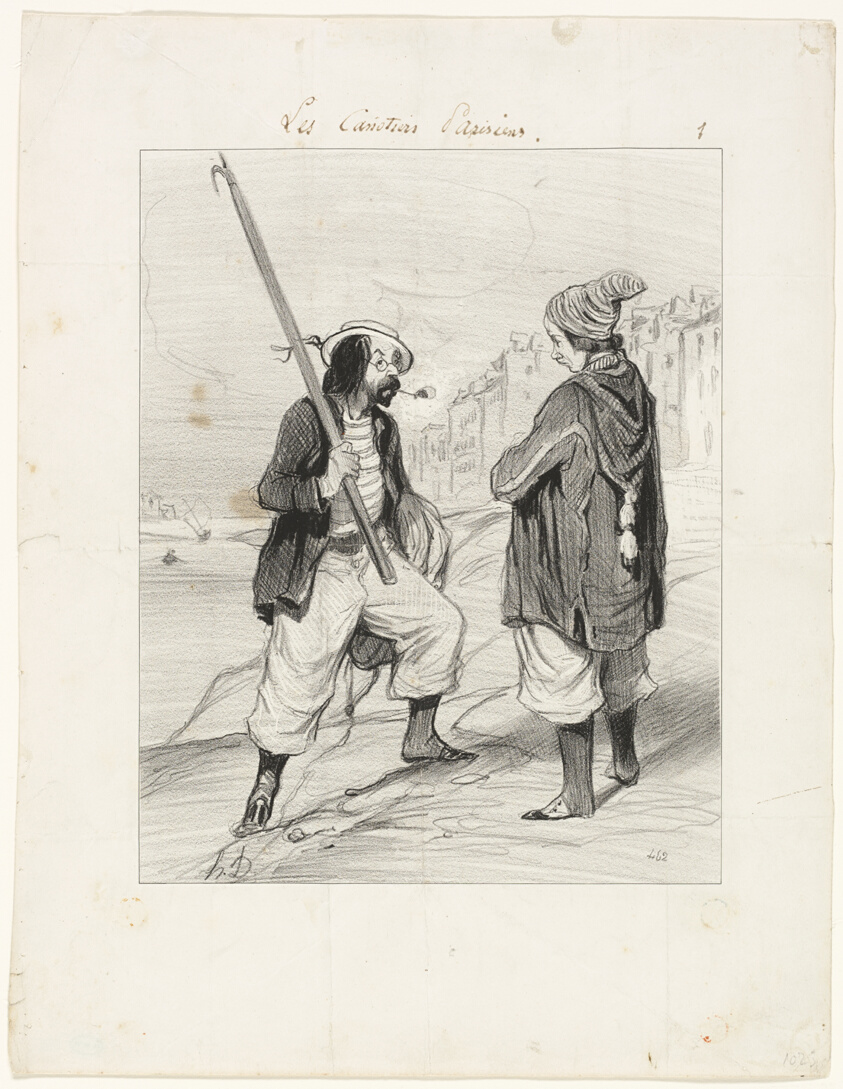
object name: Print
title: All Right Rigobert, My Old Friend…, plate one from Les Canotiers Parisiens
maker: Honoré-Victorin Daumier (French, 1808-1879)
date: 1843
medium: Lithograph in black, with additions in pen and brown ink (discolored to grayish brown), on ivory wove paper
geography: France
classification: lithograph; print; prints and drawing